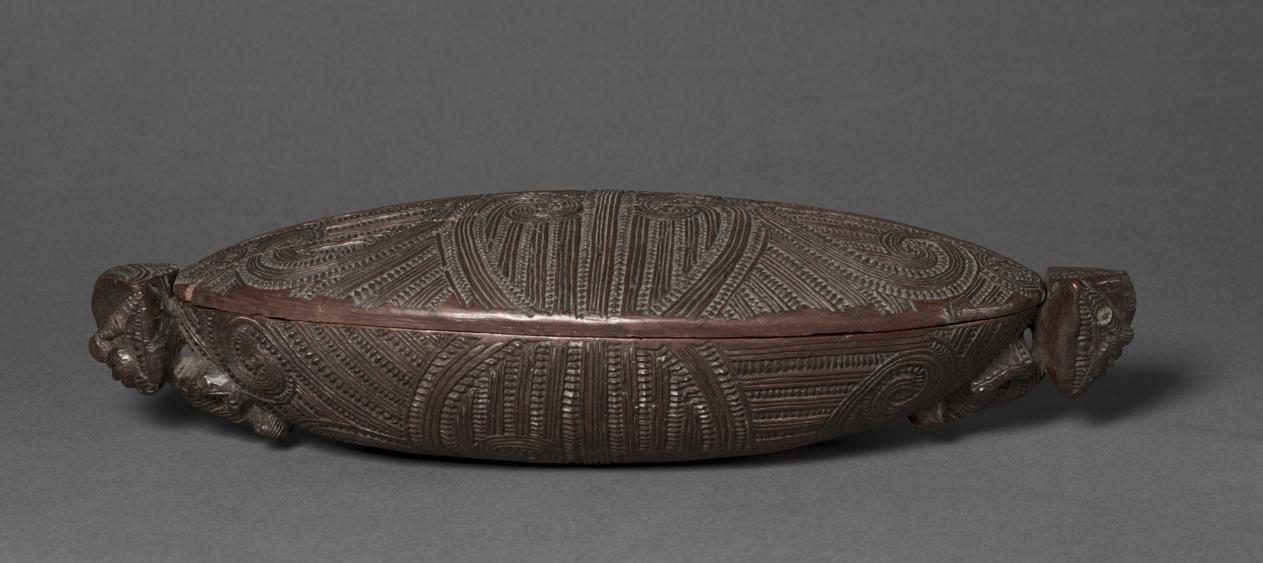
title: Treasure Box (Wakahuia)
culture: Polynesia, New Zealand, Maori people, 19th century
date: 1800s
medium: wood with abalone shell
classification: Sculpture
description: Decorated with low-relief spiral designs and small carved figures at each end, the treasure box was used to store ornaments worn by chiefs: feathers of the huia bird, combs, and pendants (hei-tiki). Because the heads and necks of high-ranking Maori chiefs were tapu, or sacred, their personal adornments were dangerous to children or individuals of lower rank. Treasure boxes were therefore hung from the rafters of the chief's house. Boxes like this one were in use when Captain Cook visited New Zealand in 1769-70.